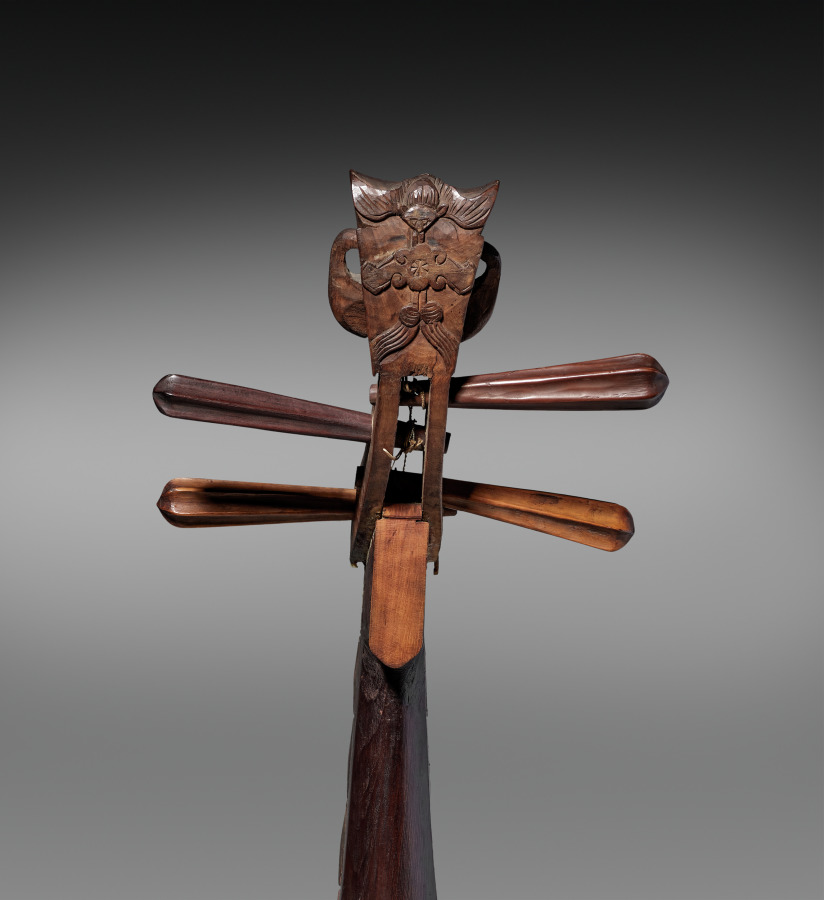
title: Pipa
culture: China, Qing dynasty (1644-1911)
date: 1800s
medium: Wood, ivory, bone, gut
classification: Musical Instrument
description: The term pipa, known since the 3rd century BC, describes the playing motion of the right hand: pi, “to play forward” (left), and pa, “to play backward” (right). A type of lute played with the fingers, it is used in opera and storytelling ensembles and has an impressive, virtuosic solo repertoire. Historic imagery, such as wall paintings, documents the spread of the pipa, along the Silk Road from western and central Asia to China. The bat finial here is a commonly used device on 19th-century Chinese lutes symbolizing good luck.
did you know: The string holder is made of bone.